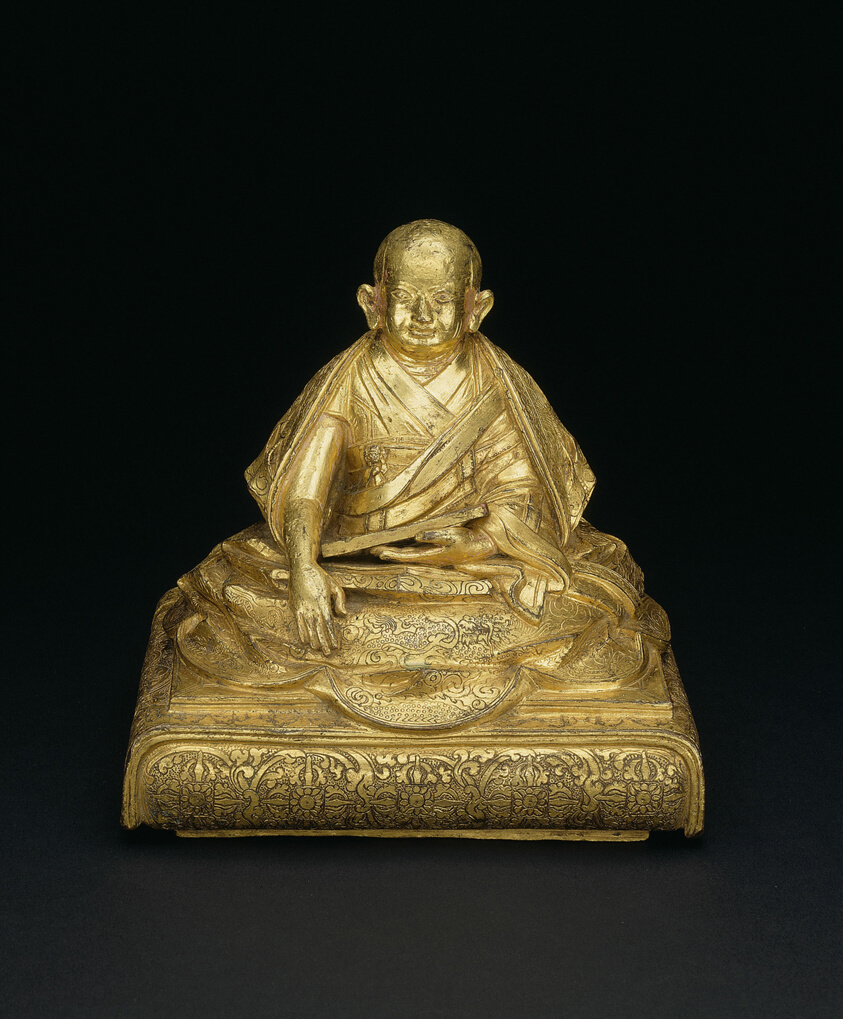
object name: Sculpture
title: Portrait of the Great Fifth Dalai Lama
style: Himalayan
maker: Tibet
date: 18th century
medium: Gilt bronze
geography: Tibet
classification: bronze; metal; sculpture; asian art